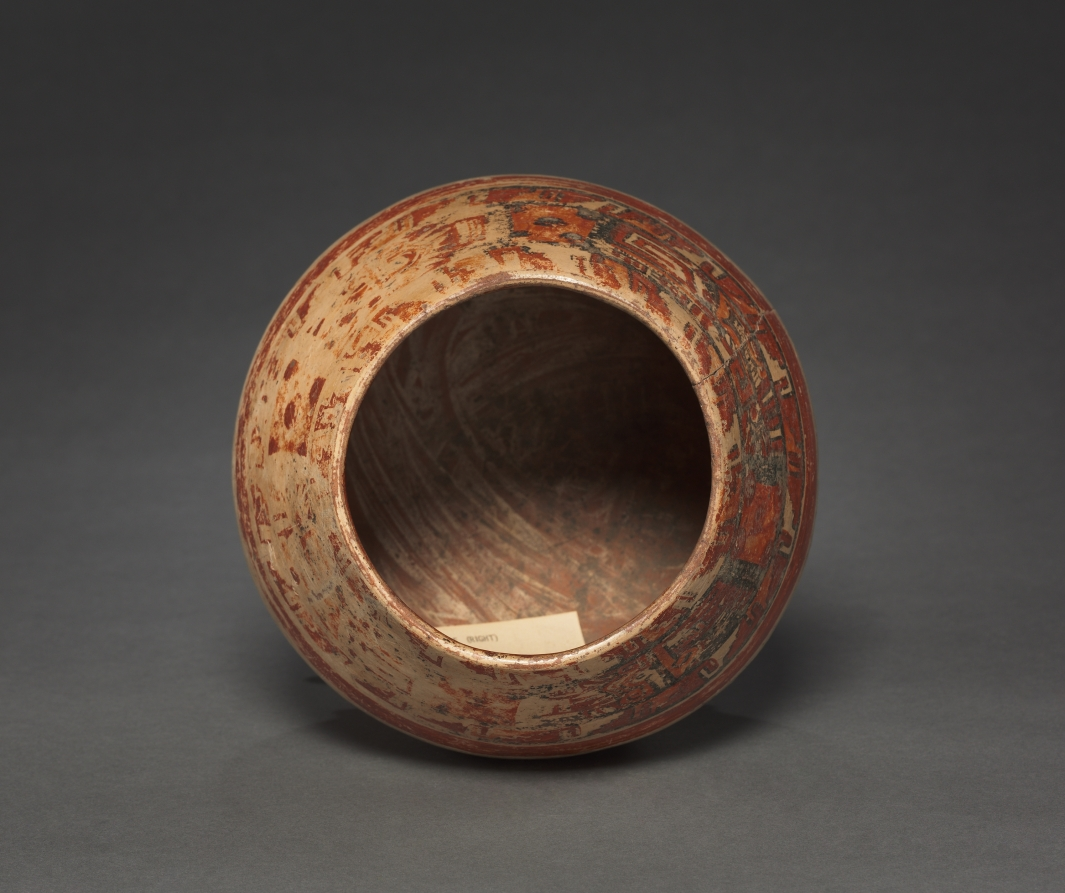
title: Vase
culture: Costa Rica, Filadelphia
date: 1000–1550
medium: earthenware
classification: Ceramic